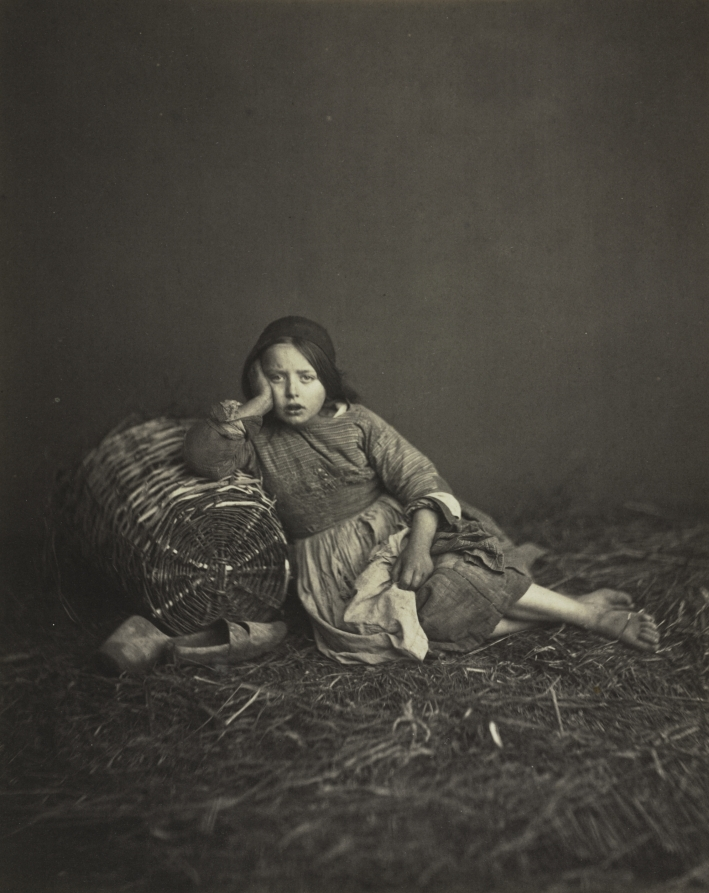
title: Young Girl Seated on Straw, Leaning on a Basket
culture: France, 19th century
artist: Edmond Bacot (French, 1814–1875)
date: 1862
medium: albumen print from wet collodion negative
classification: Photograph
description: The women depicted outdoors by Édouard Manet and Berthe Morisot are usually enjoying leisure activities in urban or suburban gardens or parks. During the same era, scenes of rural labor were popular subjects for many painters, who sometimes turned to photographs as models for the figures in those paintings. Another print of this photograph and several other images of the same girl were owned by the novelist Victor Hugo, a champion of the working classes. Edmond Bacot took them while visiting Hugo.